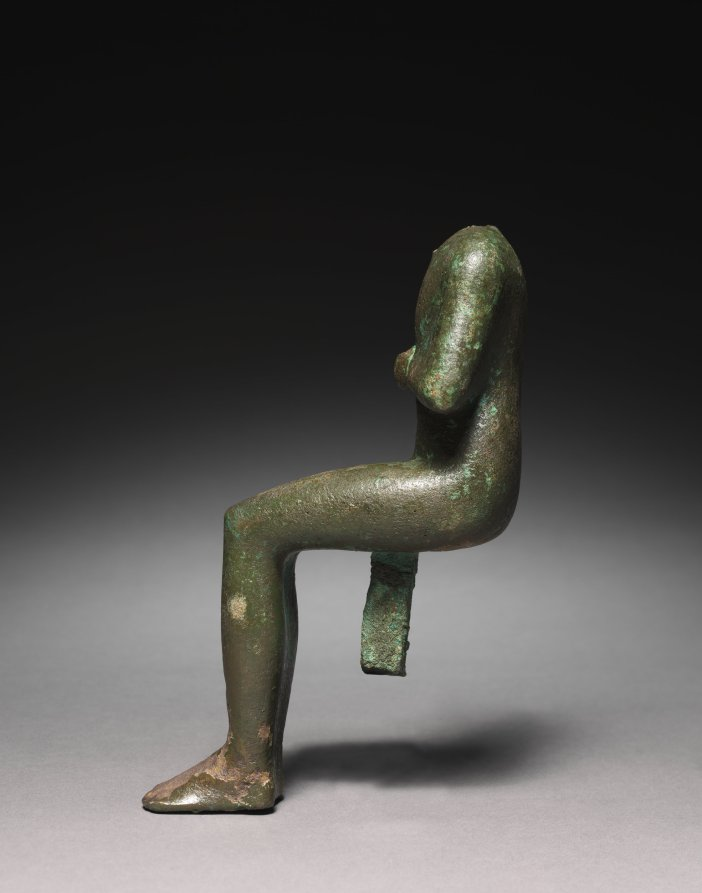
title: Statuette: Seated Mummiform Deity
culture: Egypt, Late period (715–332 BCE), Dynasty 26 or later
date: 664–525 BCE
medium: bronze, solid cast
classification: Sculpture